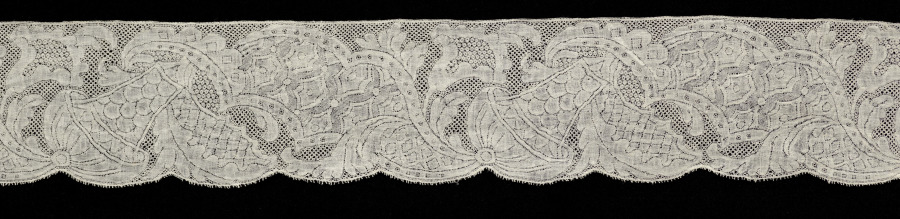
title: Lace Edging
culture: France, Valenciennes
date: 1700s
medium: Linen: bobbin lace (Valenciennes)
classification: Lace